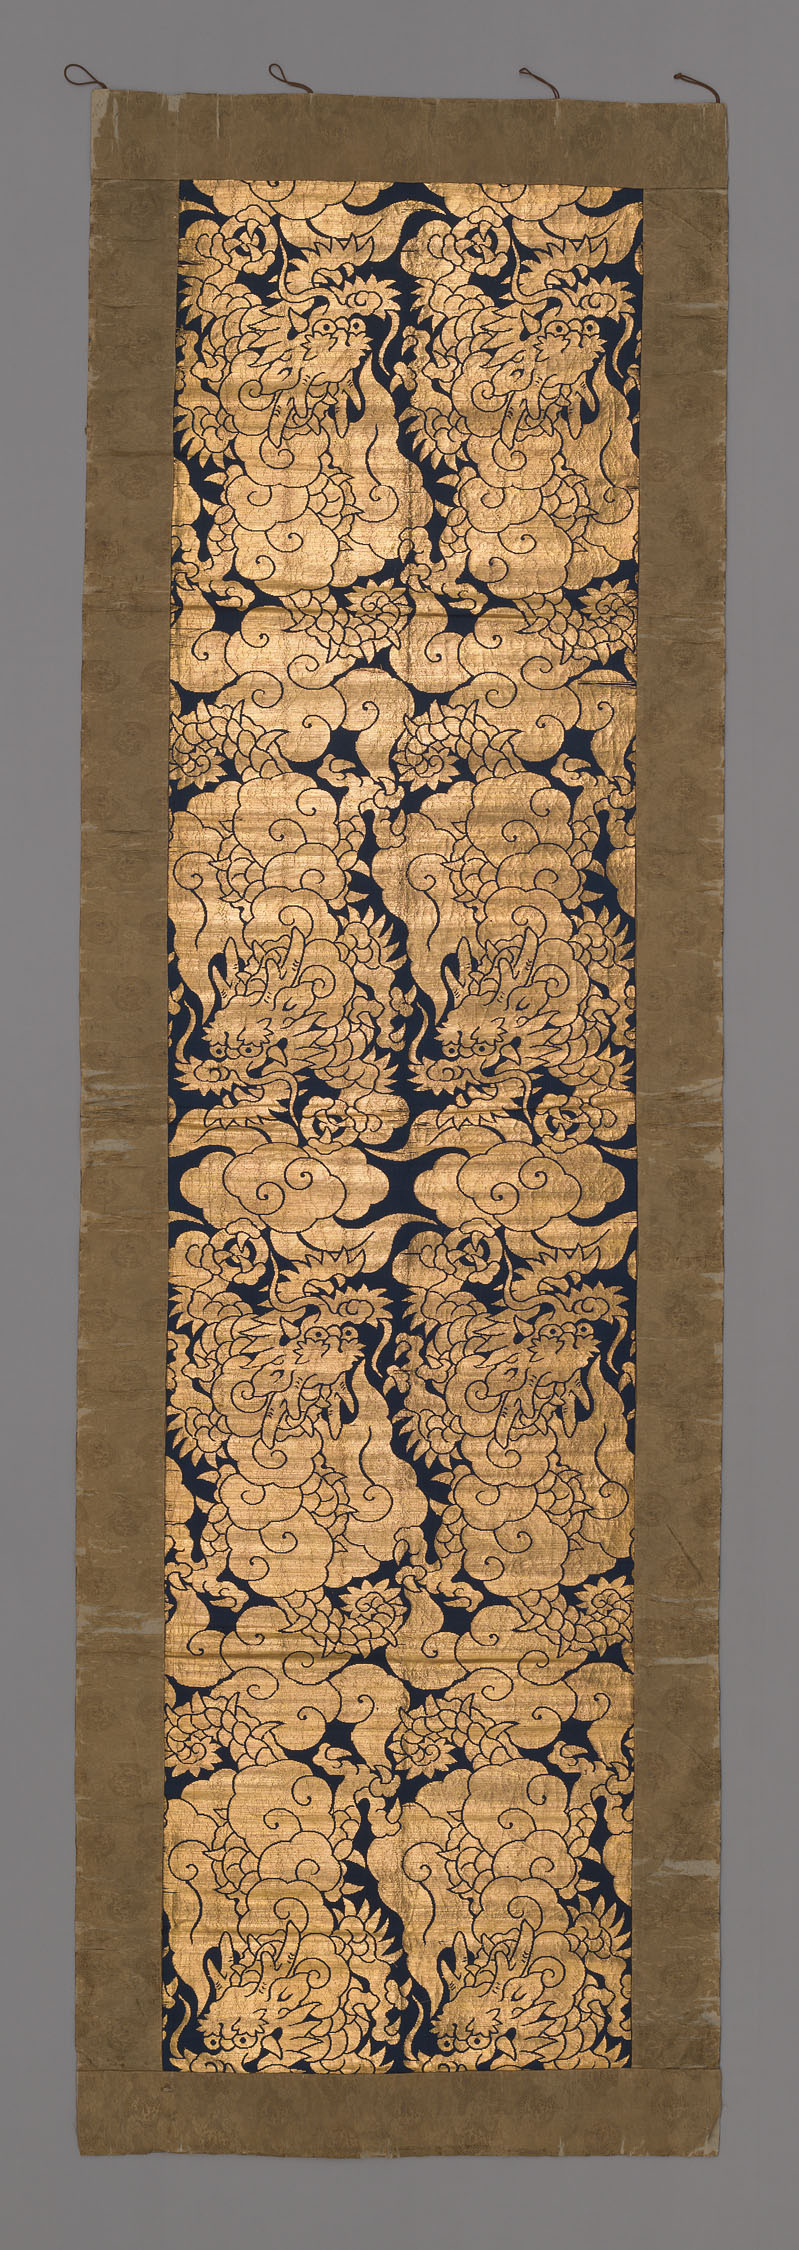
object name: Textile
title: Probably a Temple Hanging (Altered)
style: Japanism, asian, late edo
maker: Japan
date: late Edo period (1789–1868), 1801/33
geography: Japan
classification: textile; weaving